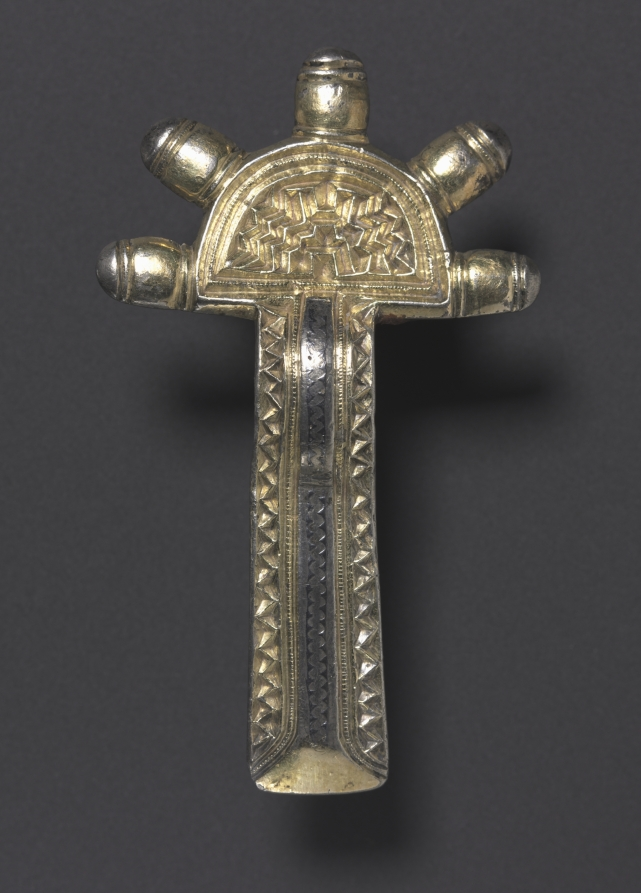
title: Bow Fibula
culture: Frankish, 6th century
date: 500–550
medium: silver gilt and niello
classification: Jewelry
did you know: Niello is a mix of metals that was common material for decorating jewelry at the time.